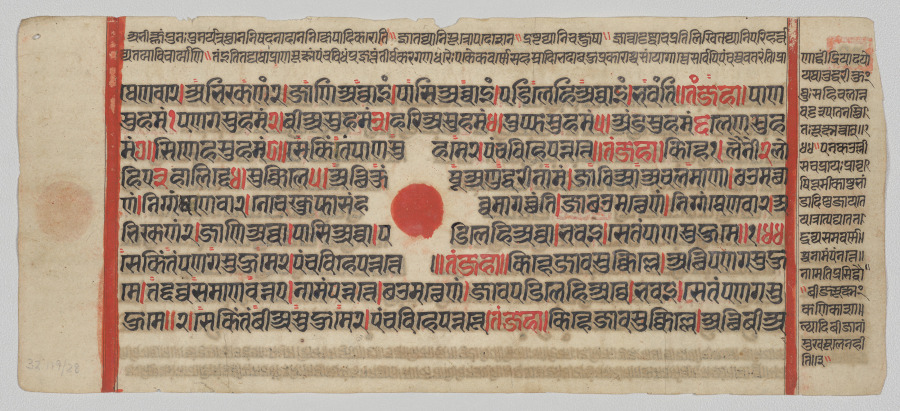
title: Text, Folio 73 (recto), from a Kalpa-sutra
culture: Western India, Gujarat, last quarter of the 15th century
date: c. 1475–1500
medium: Gum tempera, ink, and gold on paper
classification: Painting